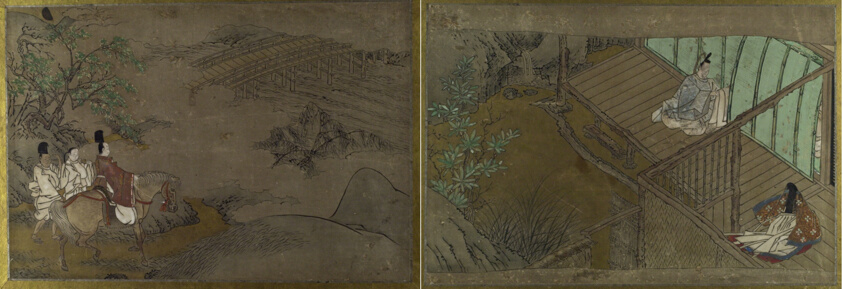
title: Tale of Genji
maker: Attributed to Tosa Mitsushige; Japanese, 1496-about 1559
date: 16th century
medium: Album; Ink and colors on paper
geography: Japan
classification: hanging scroll; painting; asian art